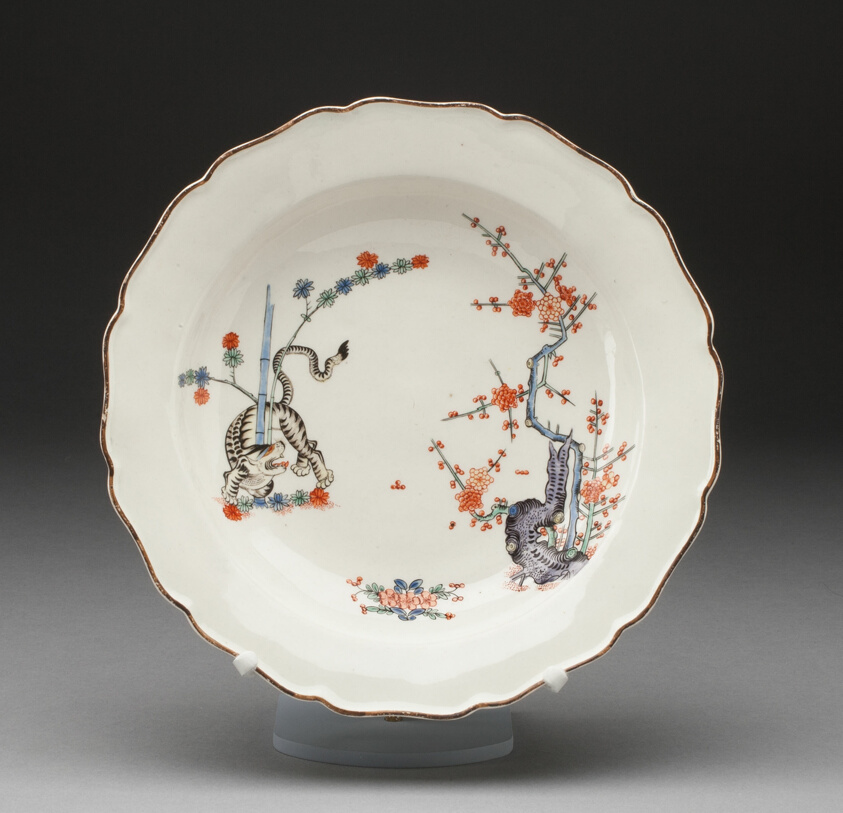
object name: Ceramics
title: Soup Plate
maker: Worcester Porcelain Factory (Warmstry House Period, 1751–1783); Worcester, England, founded 1751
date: c. 1770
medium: Soft-paste porcelain, polychrome enamels and gilding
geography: Worcester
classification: plate (general, dish); dish (vessel); porcelain; european decorative arts; ceramics